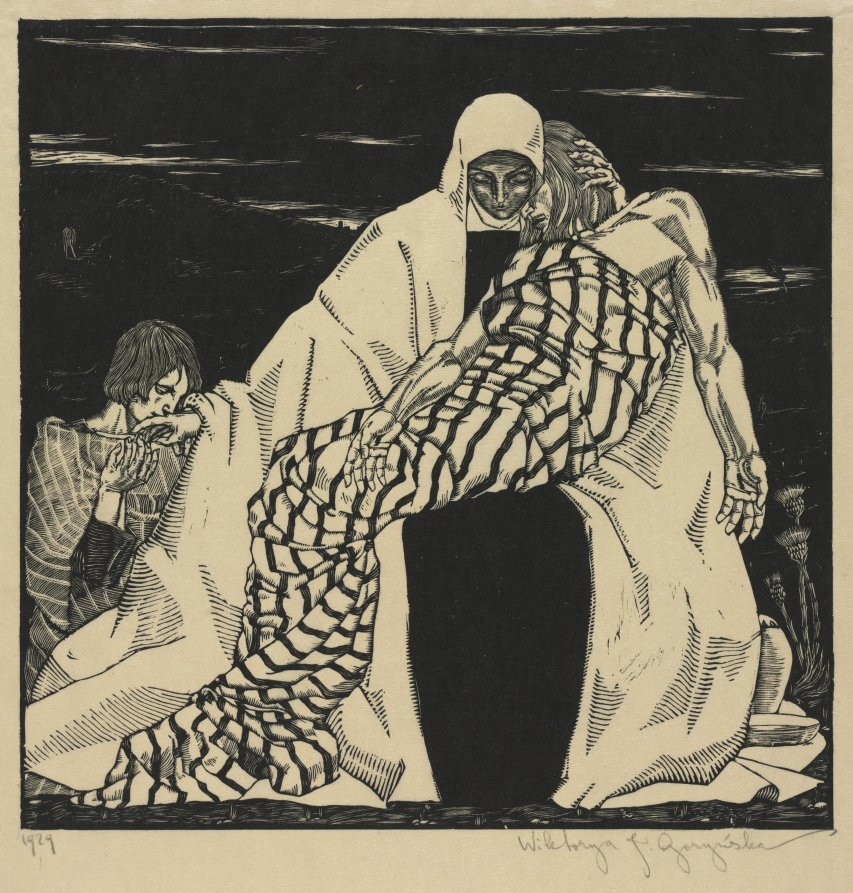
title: Pietà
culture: Poland, 20th century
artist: Wiktorya J. Gorynska (Polish, 1902–1945)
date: 1929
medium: wood engraving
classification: Print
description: Twentieth-century artists, particularly those seeking to express religious feeling, often turned to Renaissance works of art as models. Although in reverse, the composition of this 20th-century pietà bears strong resemblance to Michelangelo’s 1498 sculpture. Both compositions are deeply mournful, capturing the sorrow of the mother's loss of her child, even while Wiktorya Gorynska’s print displays aspects of modern art such as flattened space and simplified, abstract forms. Gorynska added unique elements, such as the striped shroud and the kneeling figure of Saint John the Evangelist at left.